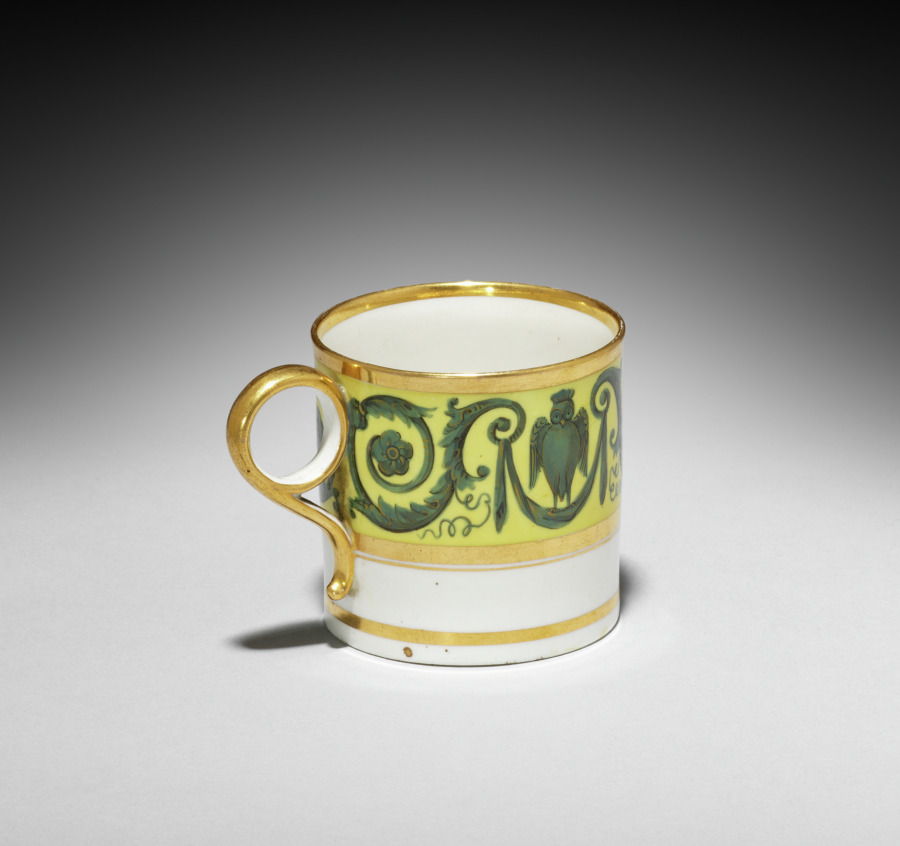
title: Cup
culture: England, 19th century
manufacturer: Worcester Porcelain Factory (British, established 1751)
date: 1807–1813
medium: porcelain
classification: Ceramic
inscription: in overglaze red: "Barr, Flight and Barr/ Royal Porcelain Works/ Worcester/ London -- House/ Flight & Barr/ Coventry Street," surrounded by: "Manufacturers to their Majesties Prince of Wales and Royal Family. Established 1751."